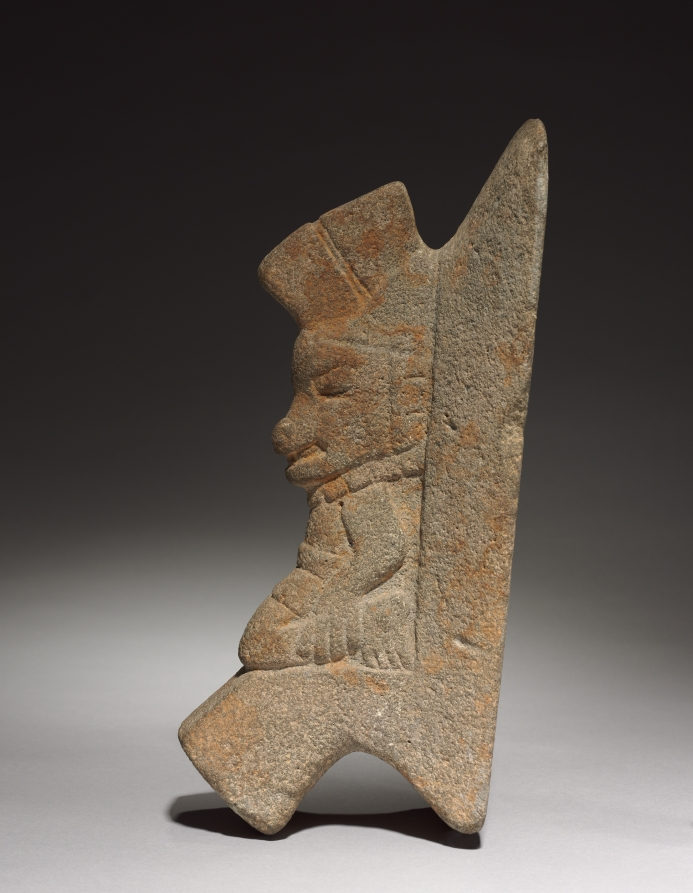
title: Animal Palma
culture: Mexico, Veracruz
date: 600–1000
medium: gray volcanic stone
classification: Sculpture